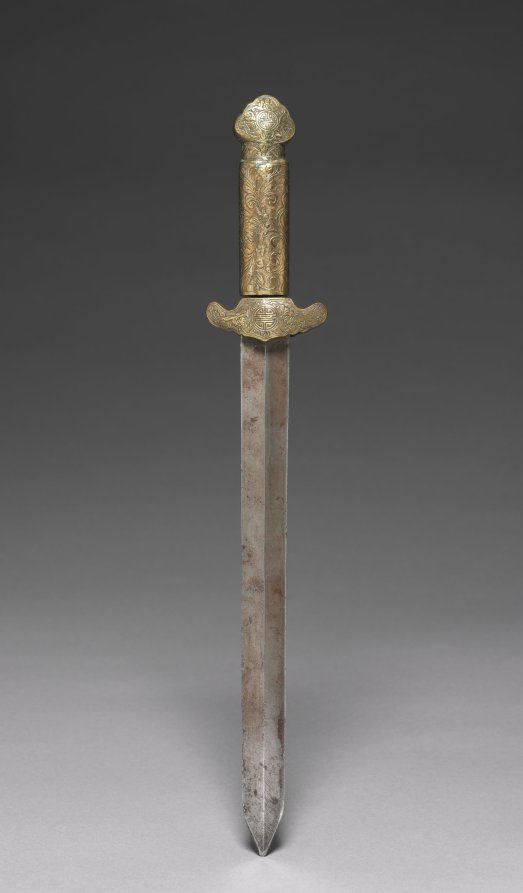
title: Dagger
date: 1800s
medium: metal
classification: Arms and Armor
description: This is a typical 19th-century double-edge short sword. The image of bats was chosen to decorate the brass mount because of their association with the idea of longevity and happiness.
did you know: This double-edged short sword is a typical 19th-century example.